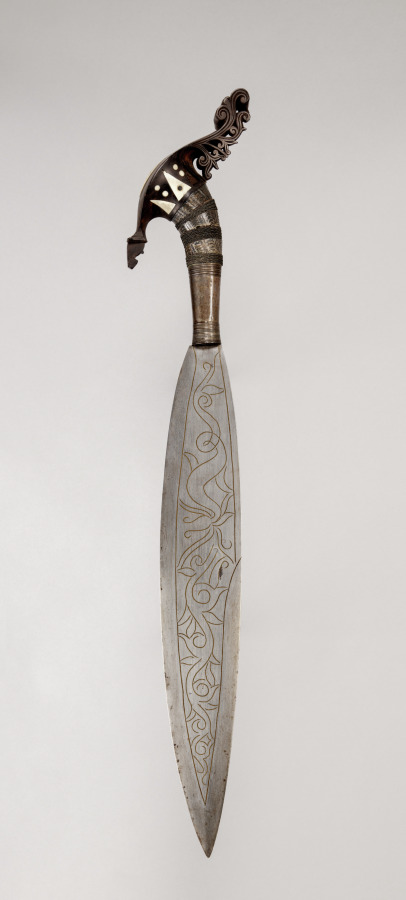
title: Sword (Barong)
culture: Philippines, Sulu or Basilan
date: before 1916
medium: Blade: metal inlaid with brass; handle: metal with silver foil, braided wire, and repoussé work; pommel: kamagong hardwood with bone inlay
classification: Arms and Armor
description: This sword’s hilt is carved from a dense Philippine hardwood known as kamagong and takes the form of a stylized cockatoo (kakatua), a motif characteristic of Tausug and Yakan sword hilts. Its broad, leaf-shaped steel blade is single-edged at the base and double-edged near the tip, making it ideal for thrusting in both warfare and ceremony.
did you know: The cockatoo-shaped pommel symbolizes vigilance and status among the Moro people of the southern Philippines.